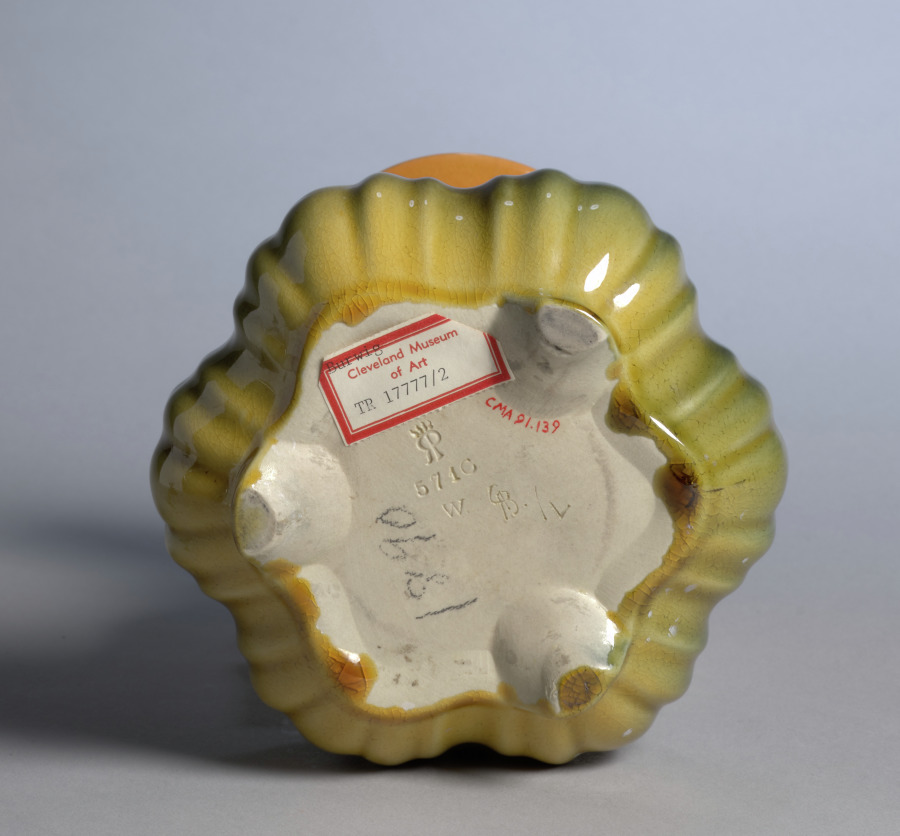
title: Vase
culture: America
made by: Rookwood Pottery Company (American, established 1880)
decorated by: possibly by Constance Amelia Baker (American)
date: 1890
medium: earthenware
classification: Ceramic